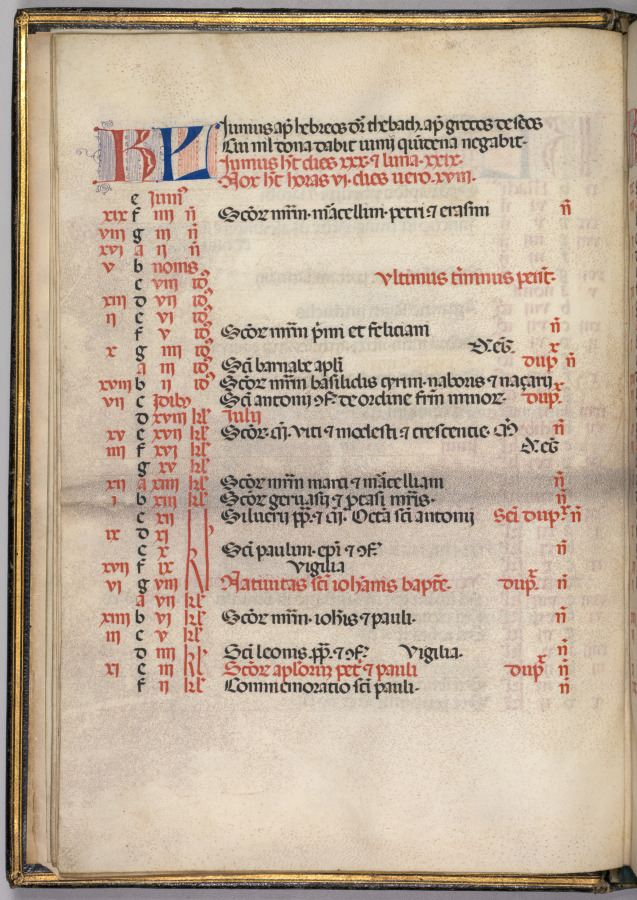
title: Missale: Fol. 5v: June Calendar Page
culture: Italy, Perugia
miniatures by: Bartolommeo Caporali (Italian, c. 1420–1503)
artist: assisted by Giapeco Caporali (Italian, d. 1478)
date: 1469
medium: ink, tempera and burnished gold on vellum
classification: Bound Volume